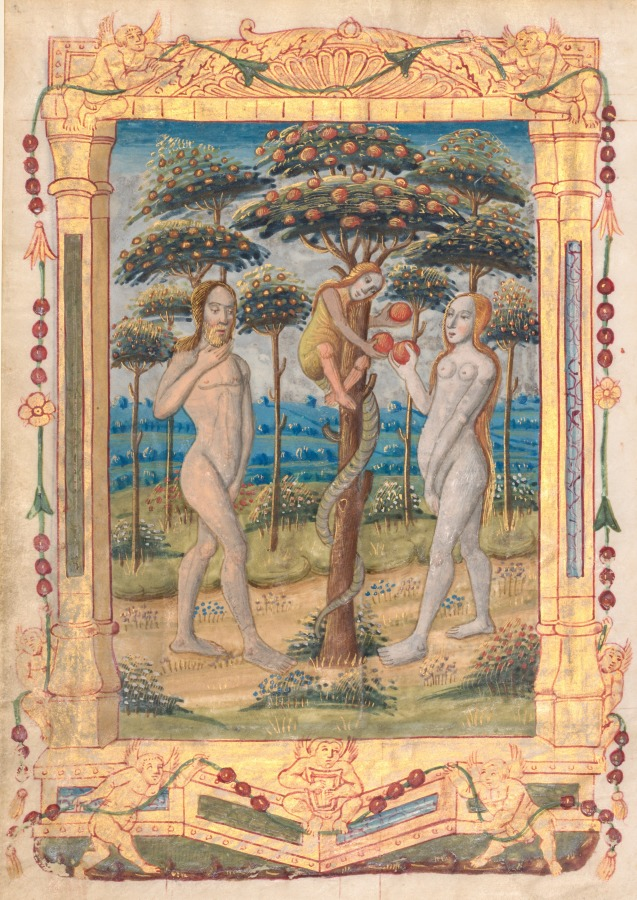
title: Leaf from a Book of Hours: Adam and Eve and the Fall of Man (Prefatory Miniature to the Office of the Virgin) (recto)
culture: France, Rouen, 16th century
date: c. 1510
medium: ink, tempera and liquid gold on vellum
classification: Manuscript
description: Characteristic of the artist's hand, the bright orange-reds combine with deep blues, greens, and an abundance of gold wash in this leaf. He used fine parallel lines or crosshatching in gold to indicate the shading, highlights, and texture of draperies, suggesting some knowledge of printmaking, an art for which Rouen was also an important center. His figures have large, thickly outlined oval faces. This miniature also demonstrates the emerging fashion in both Rouen and Paris for highly involved, Italianate architectural frames: winged putti, swags, urns, garlands, scallop shells, pillasters, and masks. These elements could be assembled in different ways so that no two frames were identical. Rouen in the late 1400s and early 1500s was an established and important center for book production. Richly decorated library texts and books of hours, such as the present leaves, were made in Rouen for sale in the cours des libraires, next to the cathedral.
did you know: This leaf came from a highly customized and lavish book of hours made in Rouen, a major center of book production at the time.